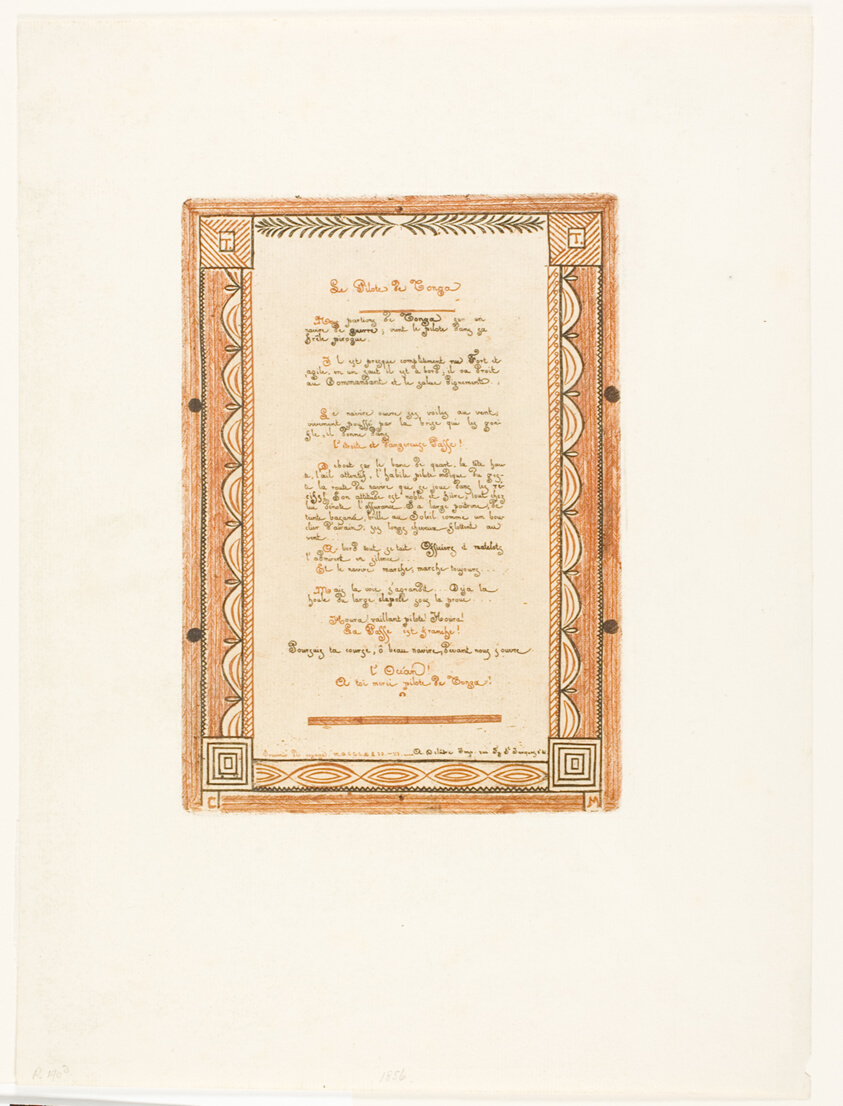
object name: Print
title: The Pilot of Tonga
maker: Charles Meryon (French, 1821-1868); printed by Auguste Delâtre (French, 1822-1907)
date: 1856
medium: Etching, from two plates, one in black and one in red (brownish), on ivory laid paper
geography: France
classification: etching; print; prints and drawing